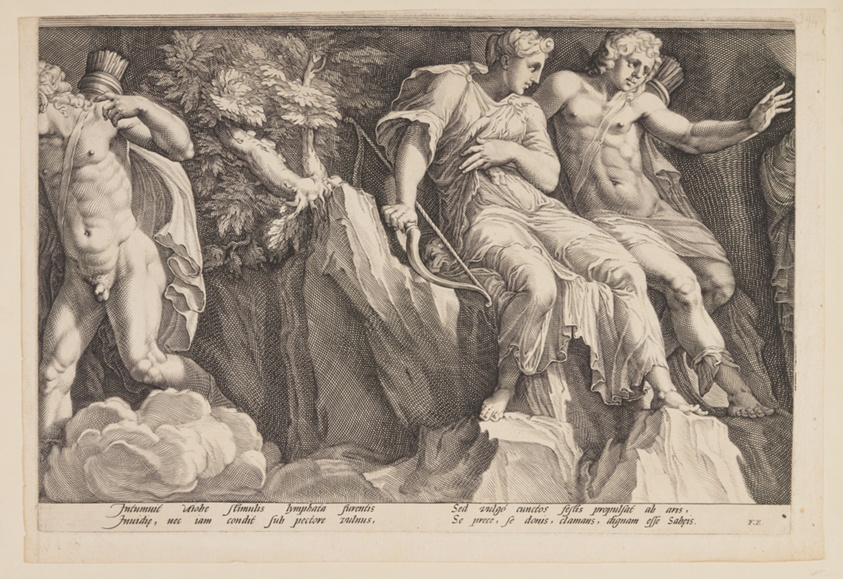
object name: Print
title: The Punishment of Niobe (Plate 3)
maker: Jan Saenredam (Dutch, 1565–1607); after Polidoro da Caravaggio (Italian, c. 1499–c. 1543)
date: 1594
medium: Engraving on ivory laid paper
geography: Netherlands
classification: print; paper; prints and drawing; engraving